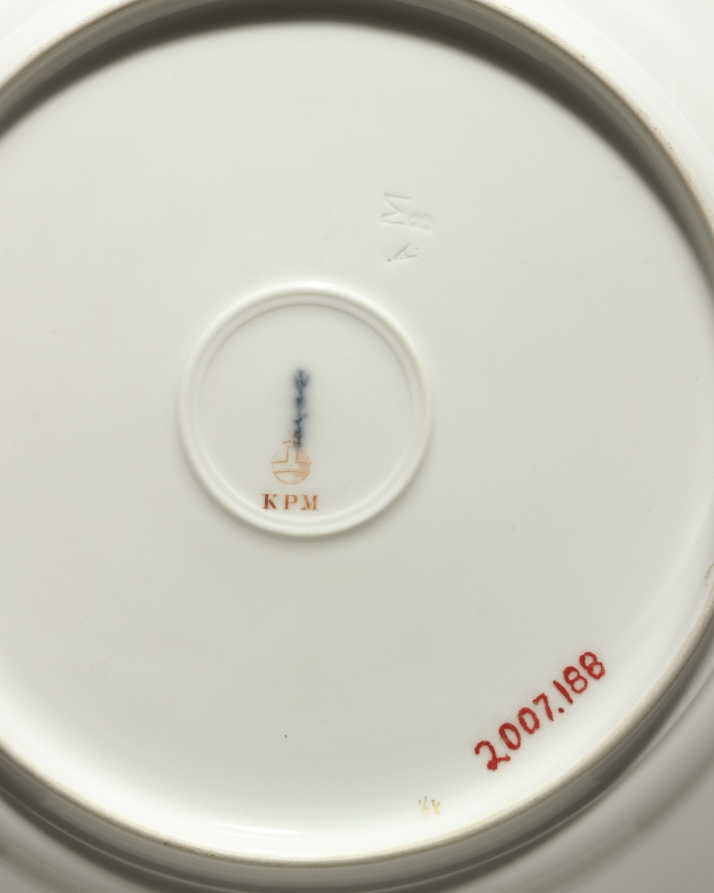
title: Plate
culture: Germany, 20th century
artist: KPM (Königliche Porzellan-Manufaktur) (German, Berlin, est. 1763)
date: 1901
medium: porcelain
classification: Ceramic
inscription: KMP" and a globe with a cross over it in red fired on overglaze enamel inside the support ring on the base.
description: Manufactured by the Royal Porcelain Factory in Berlin, this plate is decorated with elegant gilding around the perimeter and yellow flowers with green leaves.